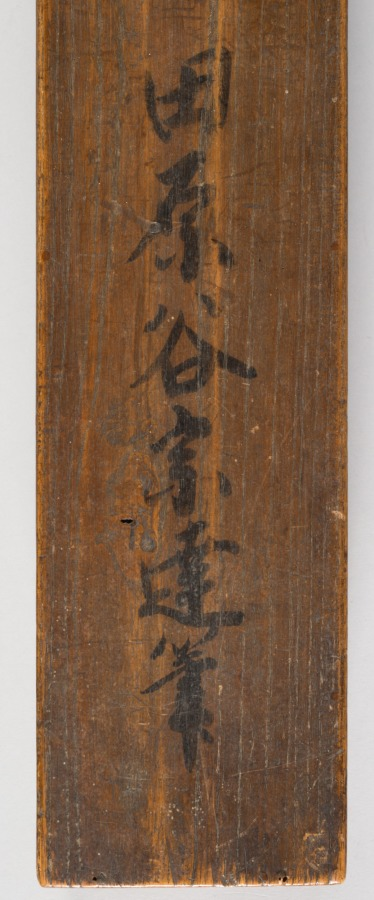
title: Puppy with Dandelions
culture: Japan, Edo period (1615–1868)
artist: studio of Tawaraya Sōtatsu (Japanese, c. 1570–c. 1640)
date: 1600–1640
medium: hanging scroll; ink on paper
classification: Painting